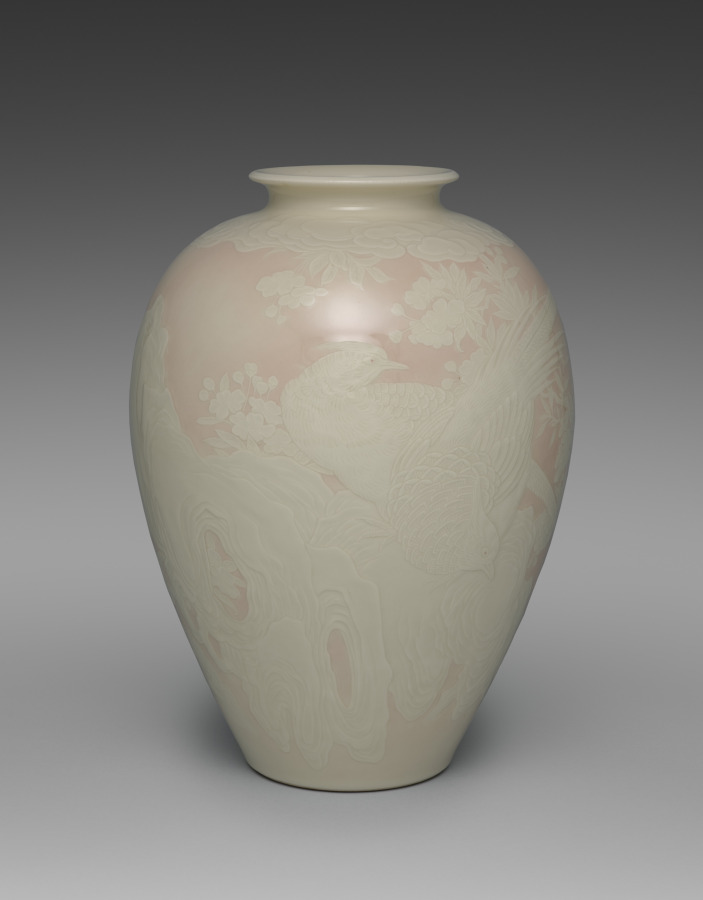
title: Pheasants in Cherry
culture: Japan, Meiji period (1868–1912)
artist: Seifū Yohei III (Japanese, 1851–1914)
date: 1900–1914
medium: Porcelain with molded and carved design, underglaze color, and cream glaze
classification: Ceramic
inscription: 大日本清風造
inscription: 清風製之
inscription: 清風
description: Like the design of Flower Vase with Phoenix in Paulownia (CMA 2022.199), the pair of pheasants in a dramatic landscape setting on this vase was created by adding clay to the surface of the clay body and then molding and carving it. Here, instead of a typical white clay, Yohei III has used an ivory clay. He then added gradated pink around the complex design, which with its multitude of cherry blossoms must have been painstaking to mask with precision. For the birds’ eyes, he added a touch of yellow. He then fired the vase with an allover translucent cream glaze. The resulting kanpakuji piece is one in which an academic subject long favored by painters of the Kano school for screen and sliding door paintings in important buildings, that of impressively sized birds within a scene of precipitous, angled rock faces and twisting trees, is made soft and ethereal while retaining a sense of gravitas.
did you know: The unusually large scale of this piece and the fact that he signed the base “Made by Seifū of Great Japan” also suggest that it was made for public display.